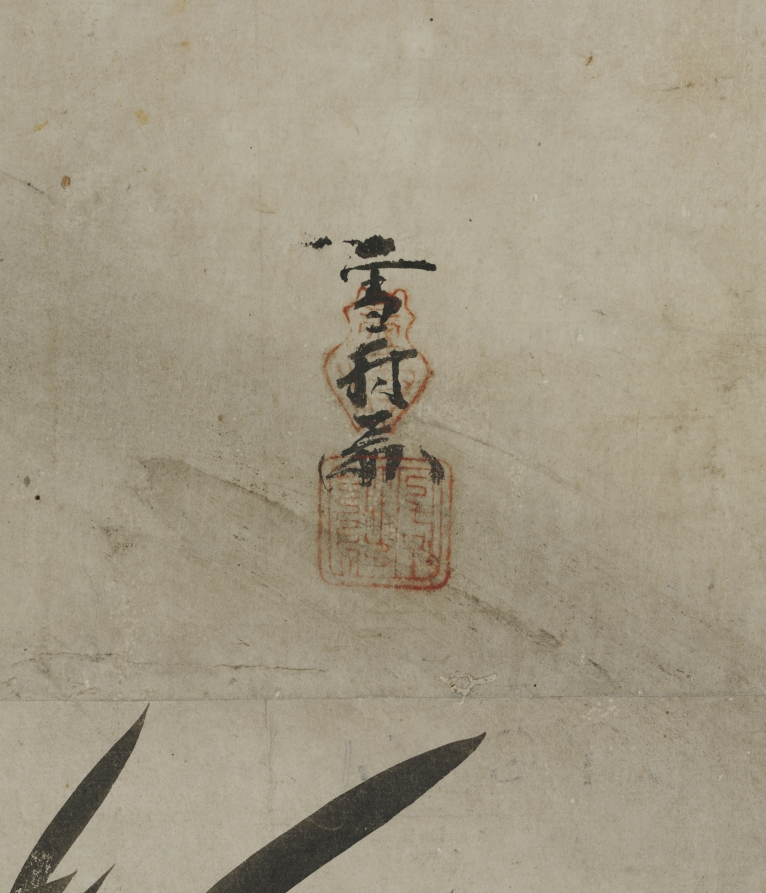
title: Dragon and Tiger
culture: Japan, Muromachi period (1392–1573) to Momoyama period (1573–1615)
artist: Sesson Shūkei (Japanese, c. 1492–c. 1577)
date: c. 1546–56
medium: One of a pair of six-panel folding screens; ink on paper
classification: Painting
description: In Chinese cosmology, the tiger's roar is said to produce wind. In Chinese paintings, the tiger is often shown with a dragon, who creates rain clouds. Together, they represent the balancing forces of the universe. Chinese presentations of the theme, often in hanging scroll format, provided the basic composition for the pair of screens to which this one belongs.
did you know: Although the theme of this painting derives from Chinese philosophy and pictorial culture, Sesson's tiger is likely modeled after Korean prototypes of the Joseon period circulating in Japan.